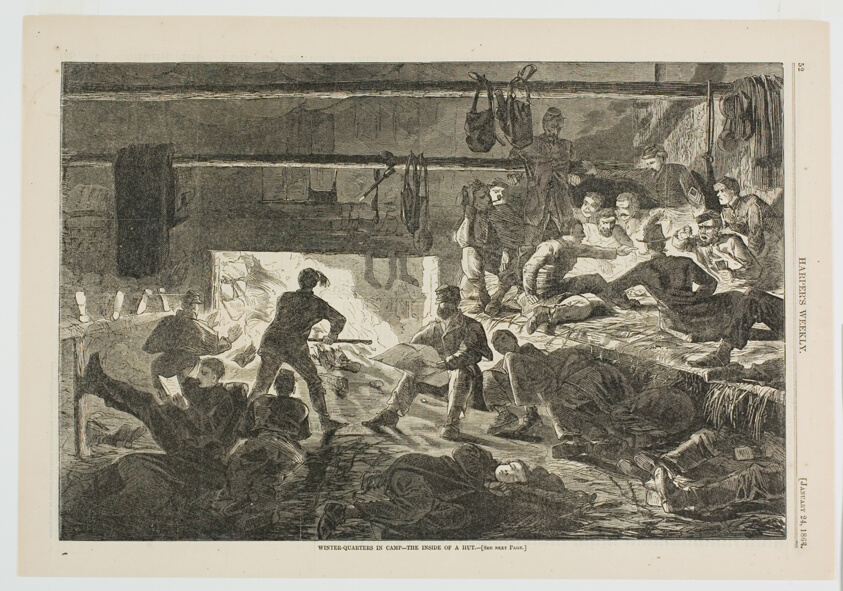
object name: Print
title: Winter-Quarters in Camp—The Inside of a Hut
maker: Winslow Homer (American, 1836-1910); published by Harper's Weekly (American, 1857-1916)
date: published January 24, 1863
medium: Wood engraving on paper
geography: United States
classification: wood engraving; print; prints and drawing